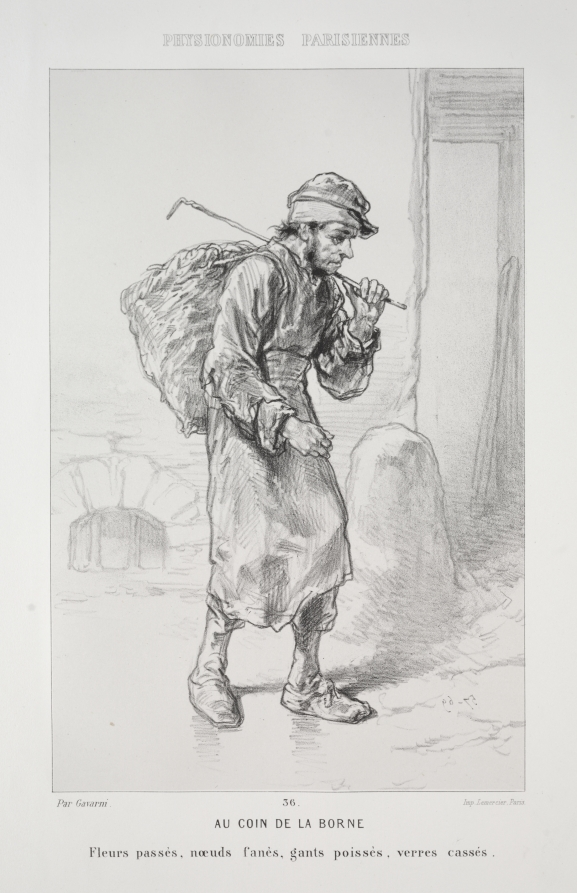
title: Au Coin de la Borne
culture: France, 19th century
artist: Paul Gavarni (French, 1804–1866)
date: c. 1857–58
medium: lithograph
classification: Print